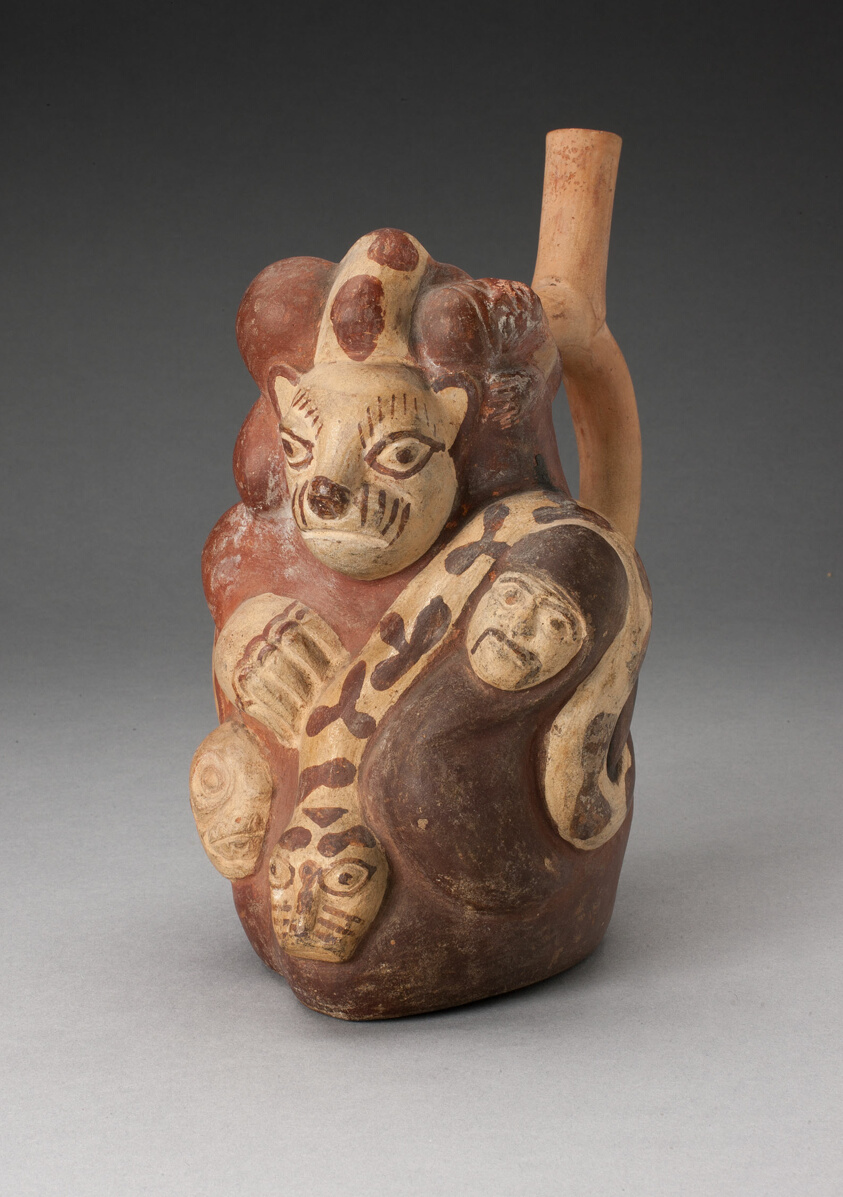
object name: Vessel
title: Handle Spouted Vessel with Composite Relief with Human Head, Puma, and Serpent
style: moche, mochica, early intermediate period, Pre-Columbian, americas, Arts of the Americas, andean, andes, south american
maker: Moche (North coast, Peru)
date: 100 BCE–500 CE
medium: Ceramic and pigment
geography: Peruvian North Coast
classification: earthenware; art of the americas; ceramics; vessel